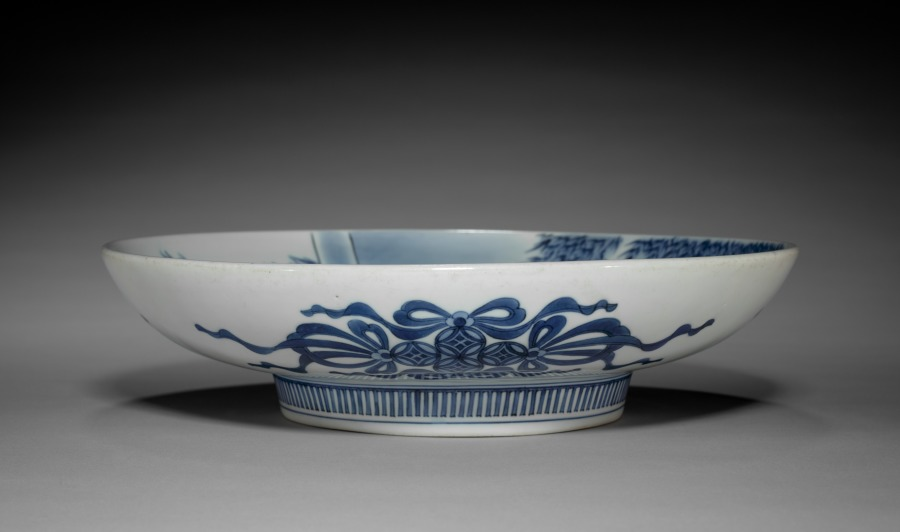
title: Plate with Willow Tree and Cloud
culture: Japan, Edo period (1615–1868)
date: 1800s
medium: Porcelain with underglaze blue (Hizen ware, Nabeshima style)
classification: Ceramic